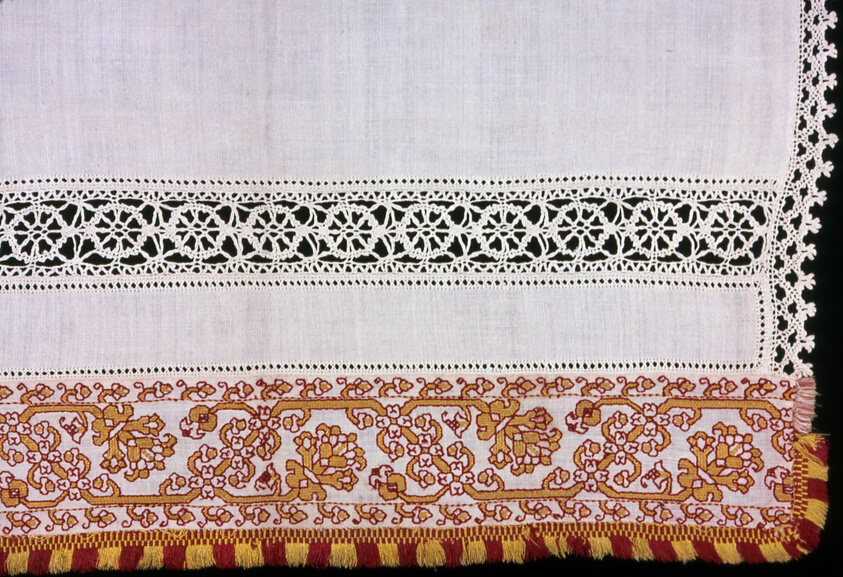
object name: Textile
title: Cover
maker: Italy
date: Probably 1601/50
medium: Linen, plain weave; drawn work embroidered with silk and linen in hem and overcast stitches; embroidered in double running and stem stitches; insert and edge of linen, bobbin straight lace; edged with silk, plain weave extended weft fringe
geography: Italy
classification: textile; needlework (visual works); lace